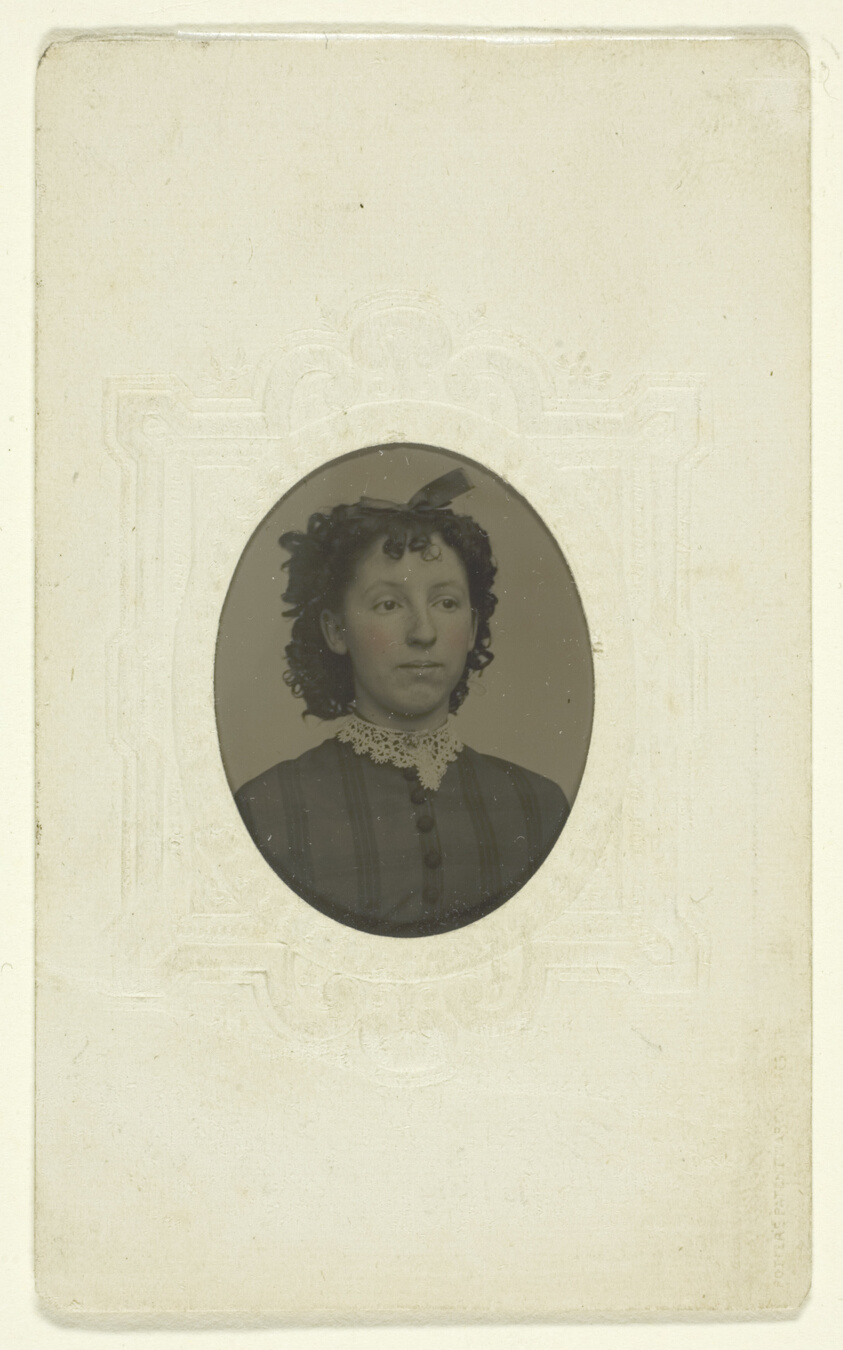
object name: Photograph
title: Portrait of Viola Mead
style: 19th century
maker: C. W. Mitchell (American, active late 19th century)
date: 1860/99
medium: Tintype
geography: United States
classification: tintype; photographic process; photography; photograph